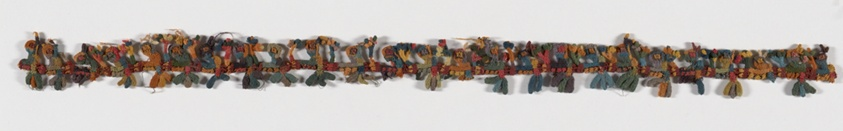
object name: Textile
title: Border Fragment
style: nazca, andean, andes, Pre-Columbian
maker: Nazca; South coast, Peru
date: 100 B.C./A.D. 200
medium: Wool (camelid), tubular cross-knit looping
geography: Peru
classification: textile; weaving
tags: super/natural